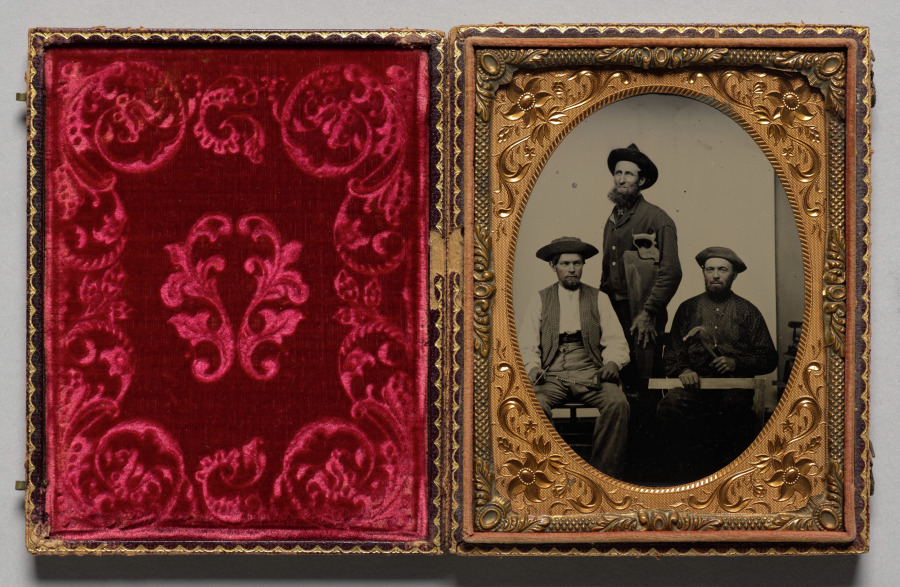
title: Three Carpenters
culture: America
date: c. 1858–65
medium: ambrotype, quarter plate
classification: Photograph